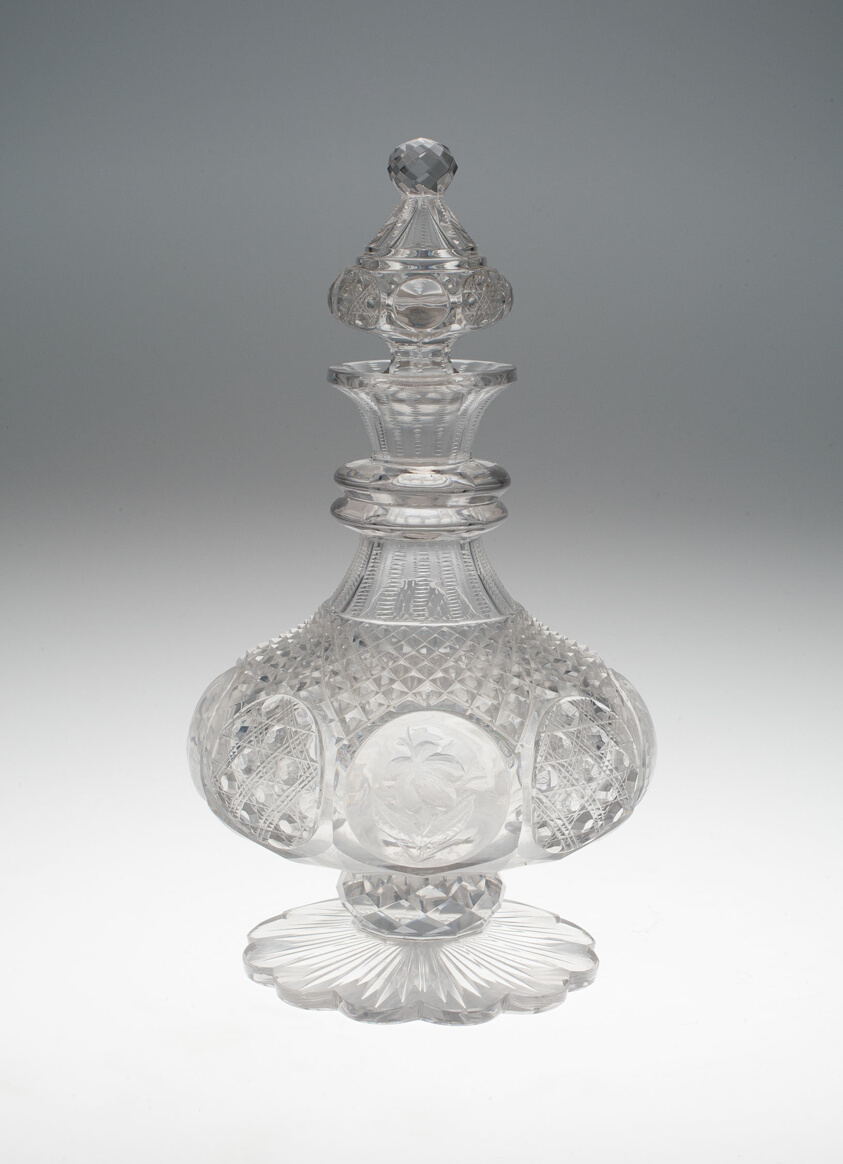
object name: Glass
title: Decanter with Stopper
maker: Baccarat Glassworks (French, founded 1764)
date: c. 1886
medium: Glass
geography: Lunéville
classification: glass; european decorative arts